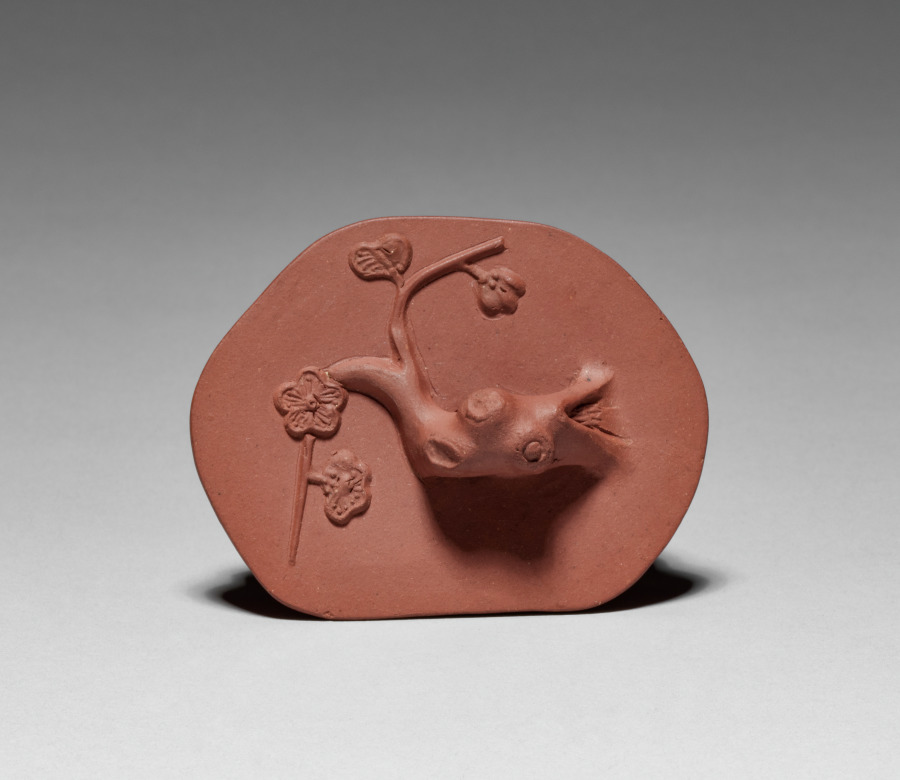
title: Yixing Teapot (lid)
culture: China, Qing dynasty (1644-1911)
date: 1800s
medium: stoneware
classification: Ceramic